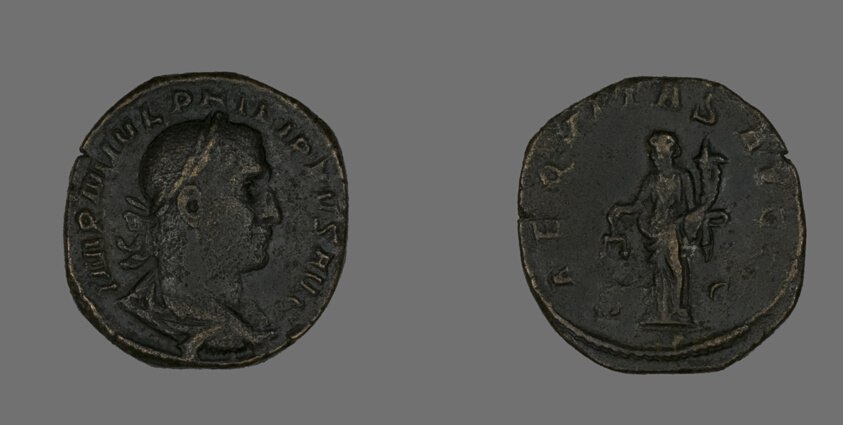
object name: Coin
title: Sestertius (Coin) Portraying Philip the Arab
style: roman (ancient, style or period), ancient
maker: Roman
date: 244-249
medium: Bronze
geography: Roman Empire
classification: coin; ancient art